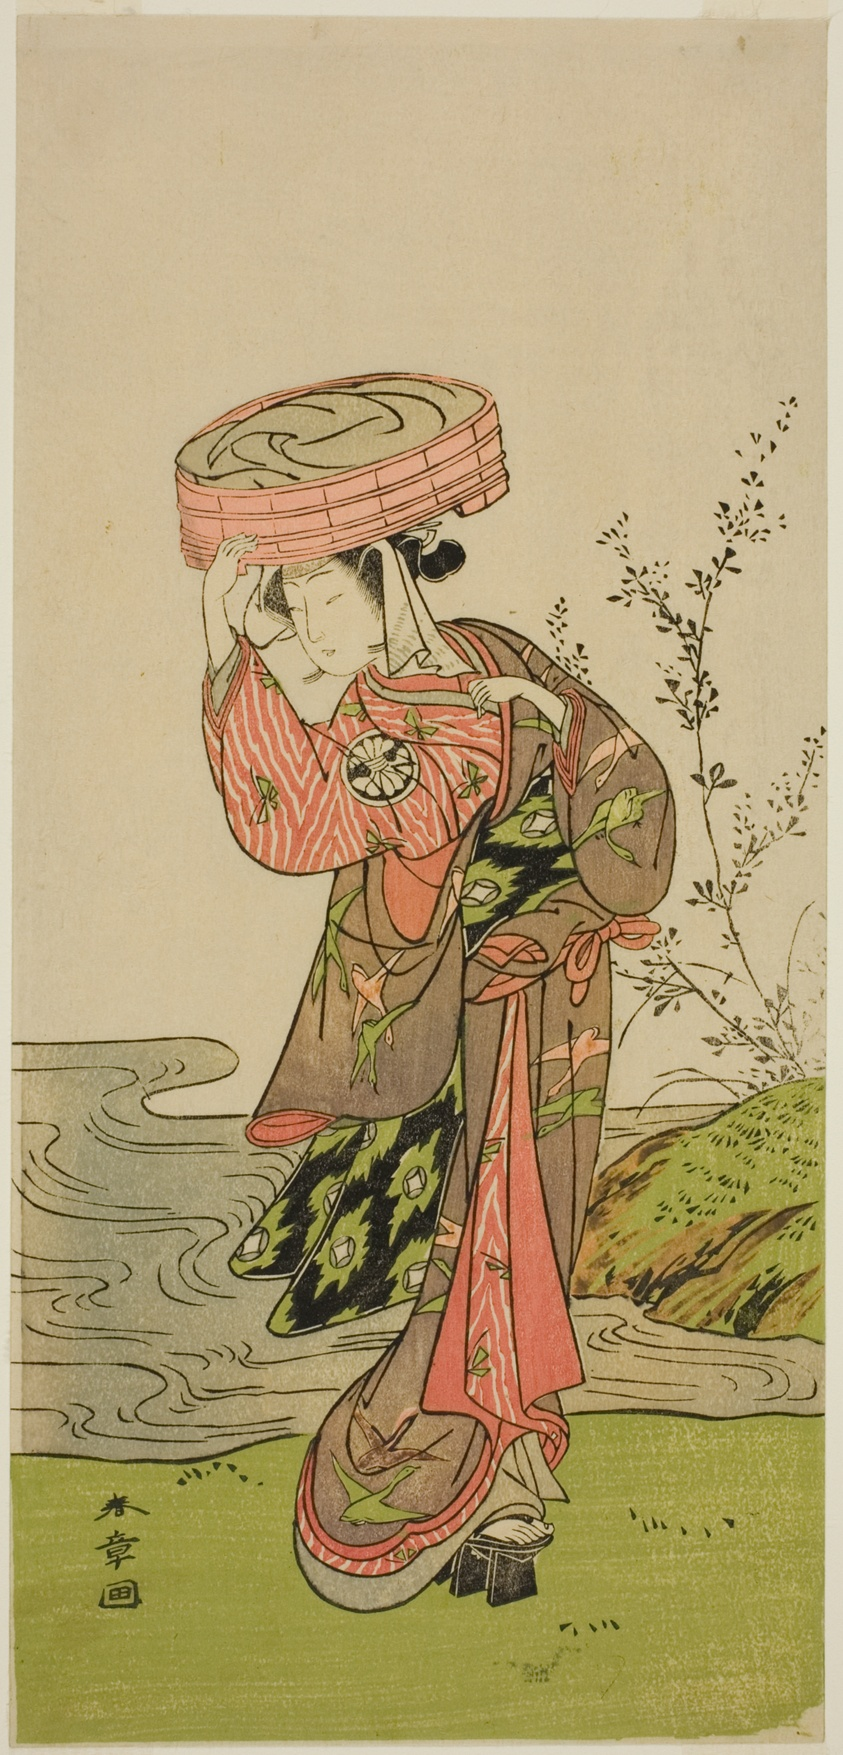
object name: Print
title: The Actor Segawa Yujiro (or Segawa Kikunojo III) in an Unidentified Role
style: Japanese (culture or style)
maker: Katsukawa Shunsho 勝川 春章; Japanese, 1726-1792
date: c. 1774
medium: Color woodblock print; hosoban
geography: Japan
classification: woodblock print; print; asian art